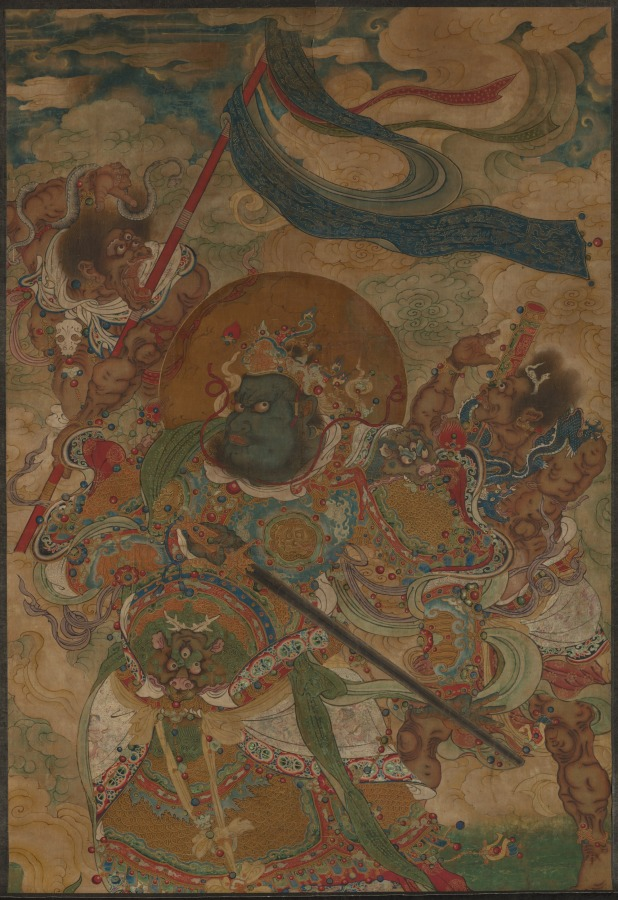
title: Heavenly King Virudhaka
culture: China, Ming dynasty (1368–1644)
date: 1368–1644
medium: hanging scroll; color on silk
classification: Painting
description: Virudhaka, Lokapala or Heavenly King of the South, is one of four guardians placed at the entrance of Buddhist temple halls or hung on all four sides of an altar for protection against evil spirits. Having a blue face, Virudhaka wears armor and holds a sword. Demons flank the deity: one with open mouth and three eyes whirls a banner and holds a snake; the other has a dragon slung around his neck.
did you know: The king's attribute is a sword carried in his right hand to protect the southern continent and the dharma, or Buddhist teaching.